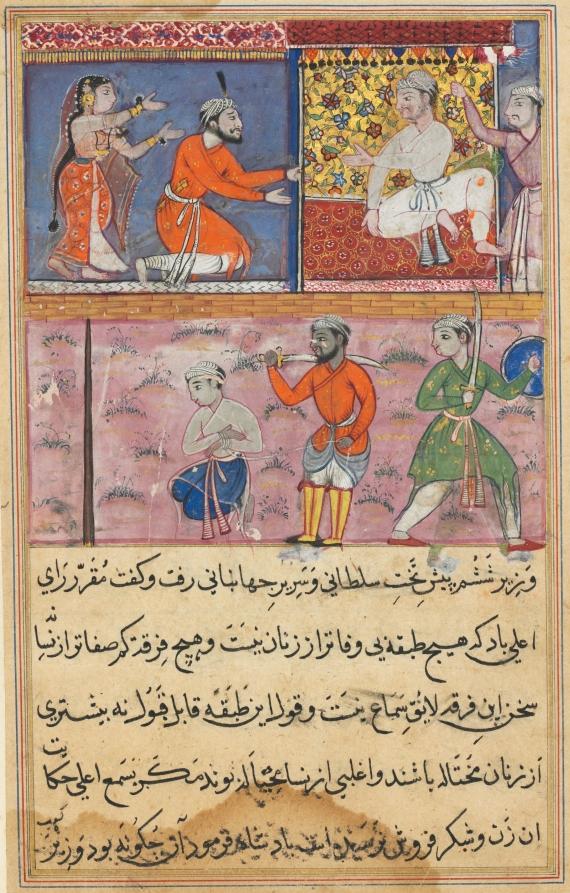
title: The prince sent back to the place of execution for the sixth time, from a Tuti-nama (Tales of a Parrot): Eighth Night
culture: Mughal India, court of Akbar (reigned 1556–1605)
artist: Suraju (Indian)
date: c. 1560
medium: gum tempera, ink, and gold on paper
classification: Painting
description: The deceitful handmaiden addresses the king, who sits against a golden floral backdrop. She appeals for the sixth time to have the young prince executed. In the lower register, the prince kneels with his hands bound, awaiting execution. The king’s vizier, dressed in orange, once again stalls the execution.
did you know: Both the handmaiden and the vizier have been overpainted and repositioned.